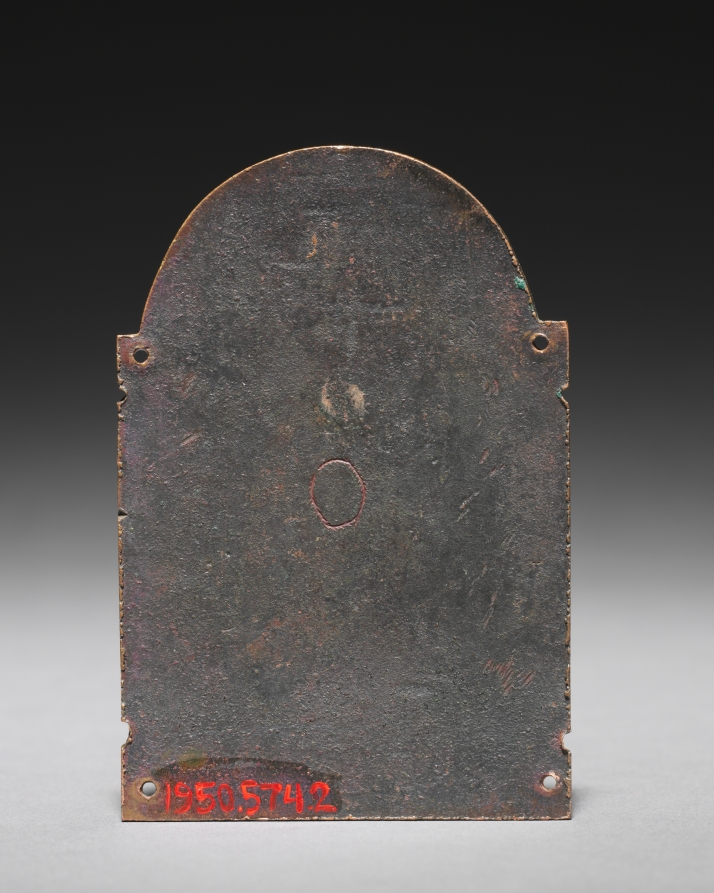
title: Plaque with Seated Prophet from a Reliquary Shrine: Heliseus (Elisha)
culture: Germany, Lower Saxony, Hildesheim, Romanesque period, 12th century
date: c. 1170–80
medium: gilded copper, champlevé enamel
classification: Enamel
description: Once used as decorations for a reliquary shrine, each enamel plaque represents a biblical prophet: Isaiah, Obadiah, Elisha, and Hosea. Fine gold dots punctuate dark blue backgrounds. Typical of Hildesheim enamels, this detailing creates the illusion that the prophets sit against star-studded twilight skies.